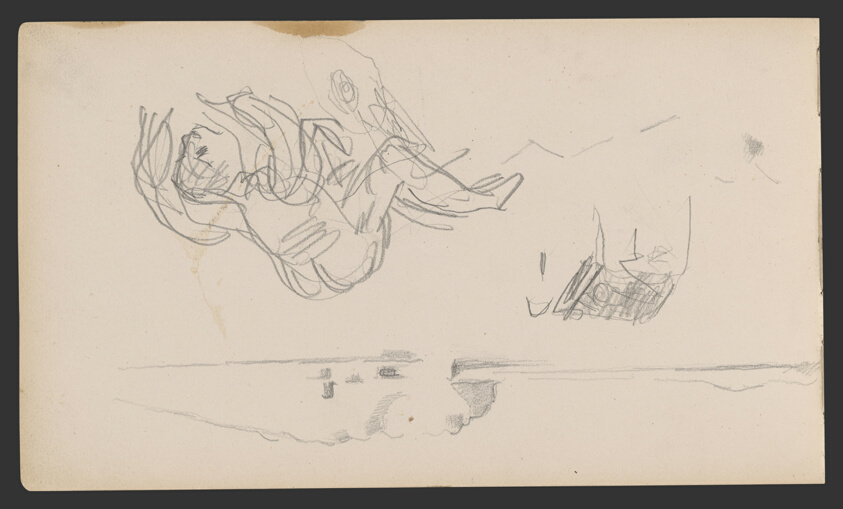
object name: Drawing and Watercolor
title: Sketchbook No. 2 (L'Estaque)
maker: Paul Cézanne; French, 1839-1906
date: 1875–86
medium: Graphite and pen and ink drawings on paper, bound into a book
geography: France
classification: sketchbook; graphite; prints and drawing; paper